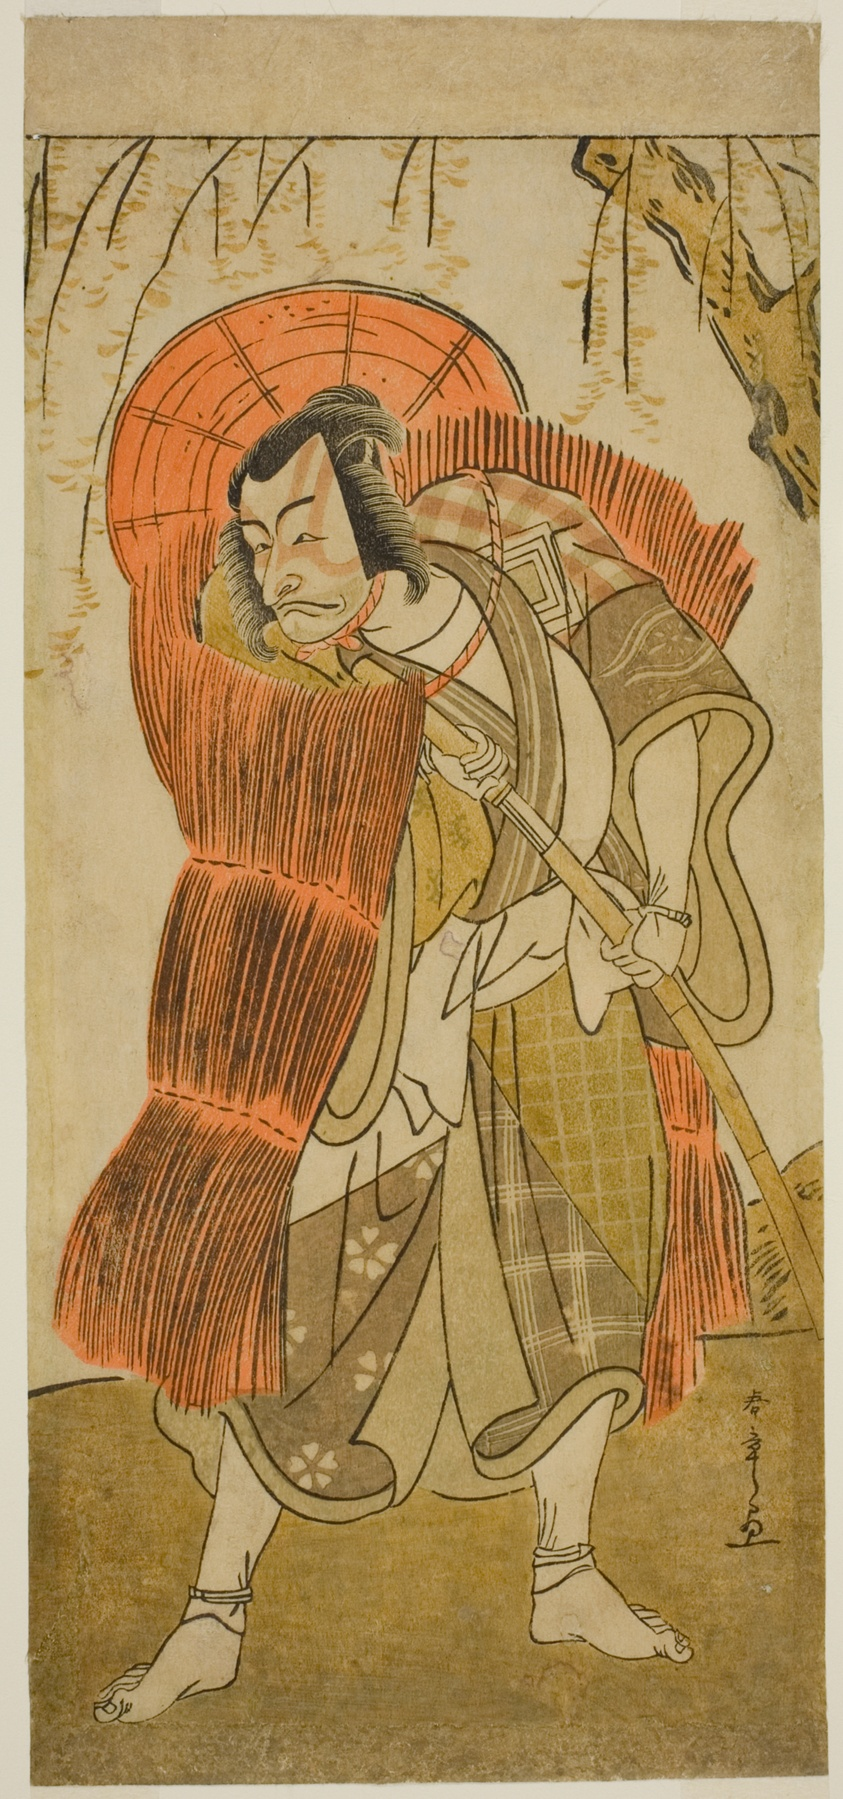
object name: Print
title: The Actor Ichikawa Danjuro V as Akushichibyoe Kagekiyo Disguised as a Beggar, in the Play Tsukisenu Haru Hagoromo Soga, Performed at the Ichimura Theater in the Third Month, 1777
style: Japanese (culture or style)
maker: Katsukawa Shunsho 勝川 春章; Japanese, 1726-1792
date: c. 1777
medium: Color woodblock print; hosoban; right sheet of diptych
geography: Japan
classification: woodblock print; print; asian art